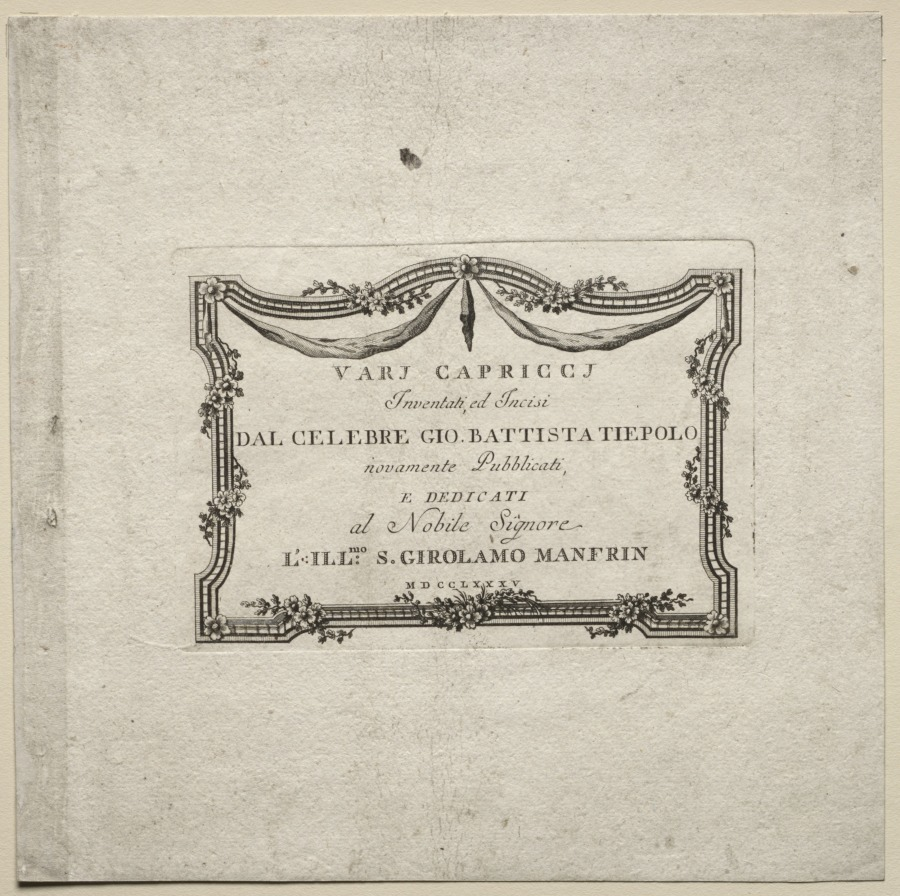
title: Various Caprices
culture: Italy, 18th century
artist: Giovanni Battista Tiepolo (Italian, 1696–1770)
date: 1735–50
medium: etching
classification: Print